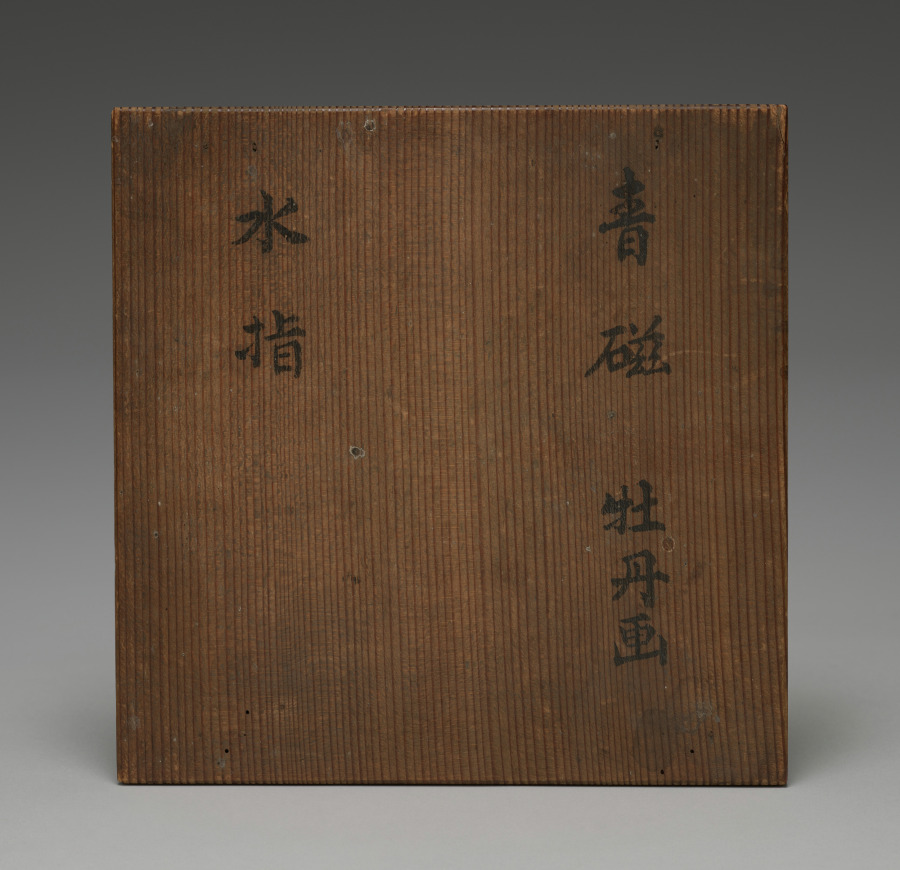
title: Water Container with Peonies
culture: Japan, Meiji period (1868–1912)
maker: Seifū Yohei III (Japanese, 1851–1914)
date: 1900–1914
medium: Porcelain with molded and carved design, green glaze, and black lacquered lid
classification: Ceramic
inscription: 清風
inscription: 帝室技芸員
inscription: 清風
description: This ceramic is an especially accomplished example of Yohei III’s combination of an allover translucent colored glaze with molded and carved designs. It features the peony as its primary motif. The water container, or mizusashi, has a green glaze, and its design takes into consideration the rounded shape and the seated position of the host and guests. It begins low on the body with a flower just beginning to open and continues with another flower a bit higher up, with its petals fully extended and beginning to open outward. It finishes with a flower in full bloom, petals and leaves unfurled and spread outward from the center, now occupying almost the entire surface. The water container once belonged to the Hosokawa family, whose go-between corresponded with Yohei IV about the piece. Yohei IV thanked them for their payment and requested that despite his father’s death in the previous year, they continue to favor the studio with their orders. The letter and its envelope, as well as an auction tag, remain with the object.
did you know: This water container may also serve as a site for cultural reckoning, as when the life cycle of a flower prized in East Asia as a symbol of wealth is displayed across a Japanese chanoyu vessel whose glaze is associated with the seats of power in China and Korea.